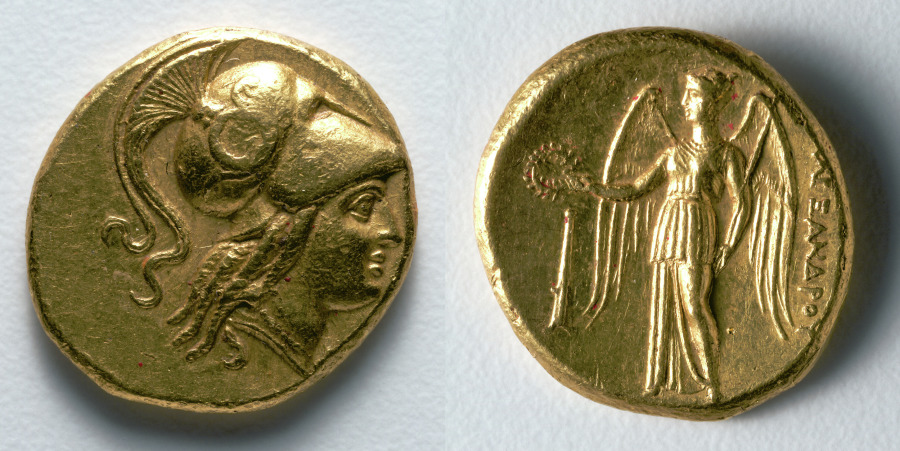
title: Stater: Head of Athena (obverse); Nike (reverse)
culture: Greek, Macedonian, minted at Salamis (Cyprus)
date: c. 325–275 BCE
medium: gold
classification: Coins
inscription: ΑΛΕΞΑΝΔΡΟΥ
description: As the forces of Alexander III [the Great] advanced into Asia, the city-state of Salamis, on the island of Cyprus, voluntarily surrendered itself and its mint. Salamis began producing Macedonian-style coinage, adopting a helmeted Athena on the obverse and a winged Nike offering a laurel wreath on the reverse. The rudder in the left field is the distinguishing symbol of Salamis, a nod to the city’s longstanding maritime prominence.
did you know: Athena appears off-center on this coin’s obverse due to an error in the minting process.